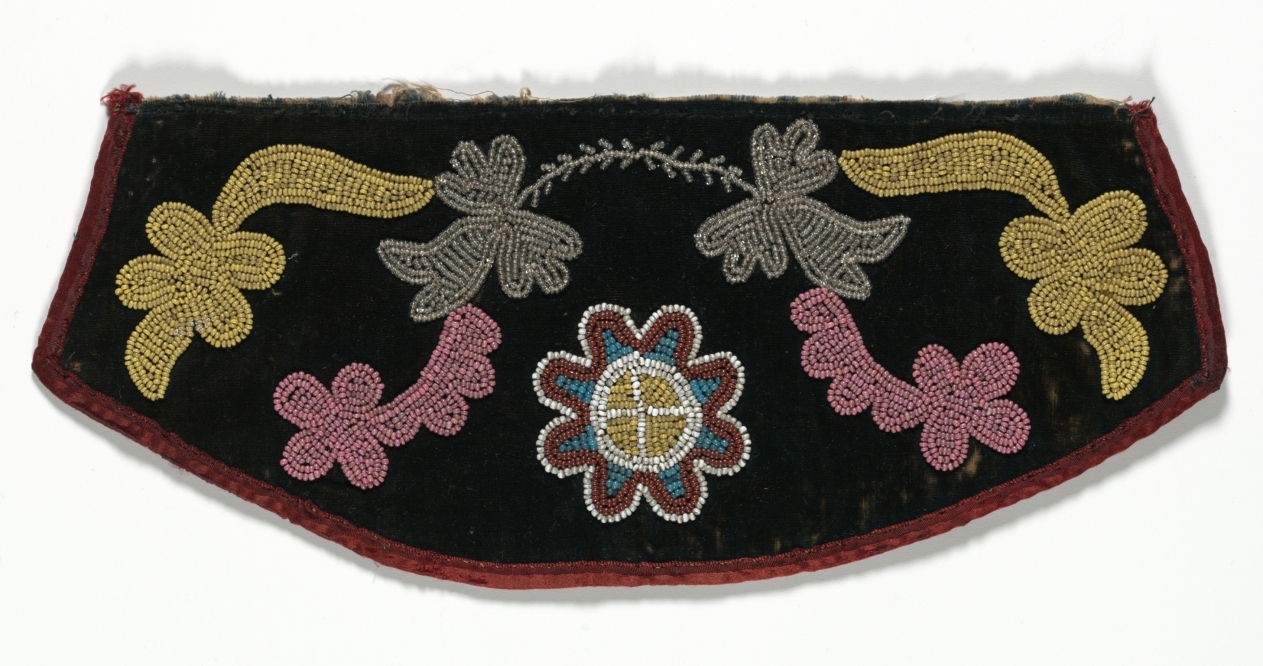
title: Cuff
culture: Northeast Woodlands, Great Lakes Region, Anishinaabe (Ojibwe) or Nehiyawak (Cree) People?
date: late 1800s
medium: Velvet, satin, glass beads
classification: Garment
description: In the 1800s, native peoples began to use European fabrics to fashion fine formal garments; they favored sturdy cloth, such as velvet and wool broadcloth, which provided support for heavy decorative beadwork that was added by hand. Often the fabric was a dark color, providing dramatic contrast for the multicolored beads. Rather than encrusting the entire garment, beadwork was confined to cuffs, “epaulettes,” bib-like plackets and yokes, rectangular panels sewn to leggings, shirts, and dresses, and the like.